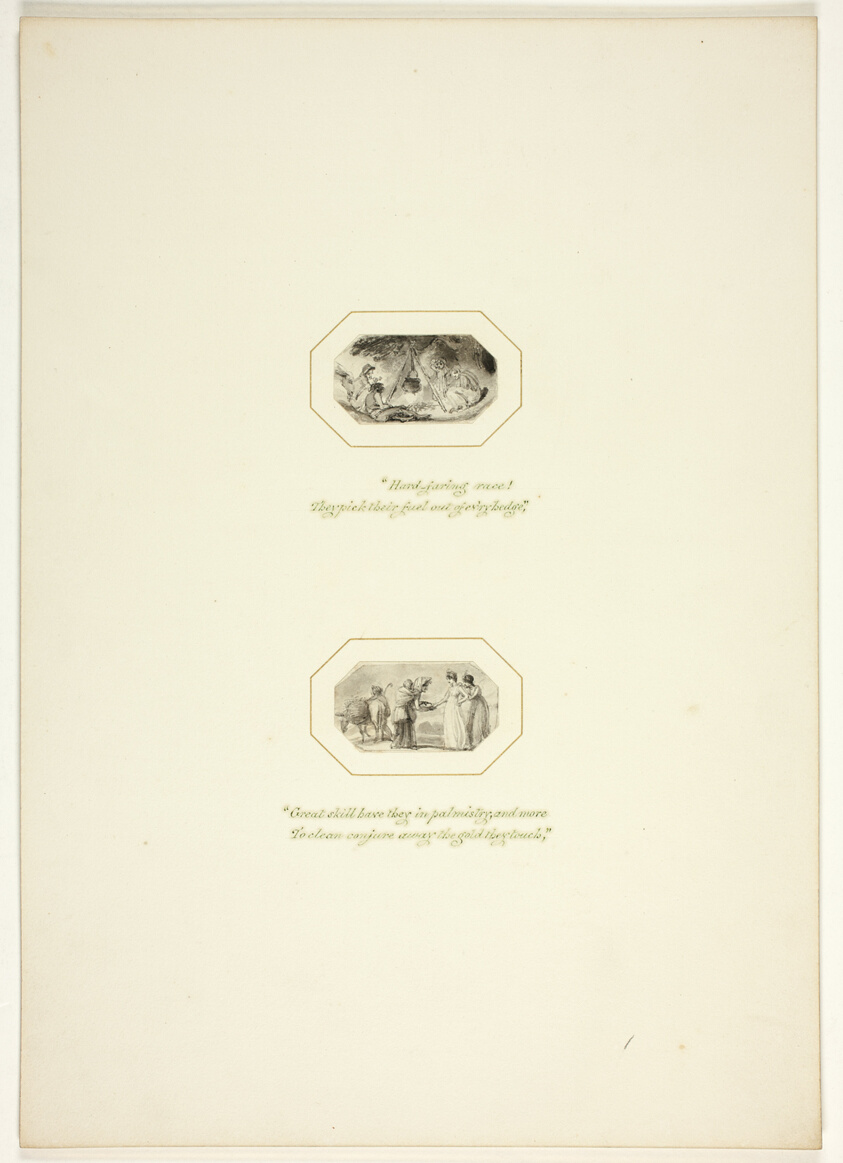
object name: Drawing and Watercolor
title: Study for a plate from The Task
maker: Thomas Stothard (English, 1755-1834)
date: c. 1800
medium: Ink wash on paper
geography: England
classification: ink or chalk wash; drawings (visual works); prints and drawing